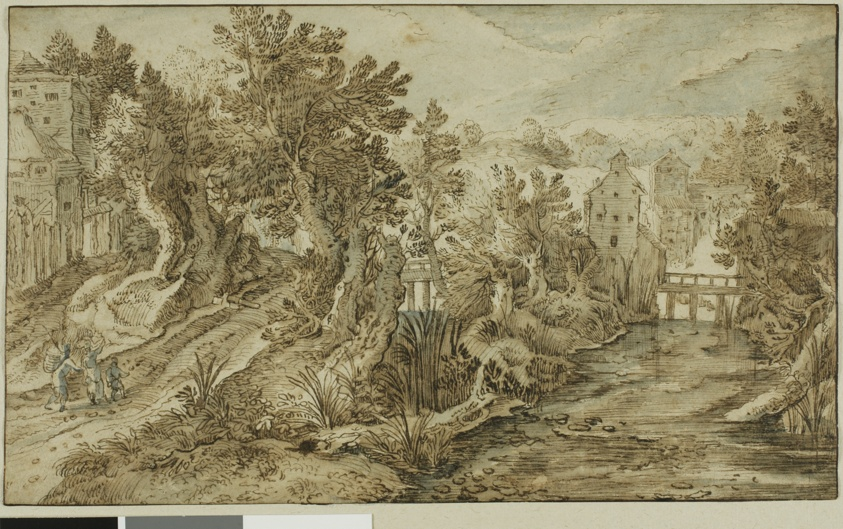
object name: Drawing and Watercolor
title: Village Scene with a River and Wooden Bridge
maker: Peeter Stevens, II (Flemish, 1567-after 1624)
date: 1595/1600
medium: Pen and brown ink and brush and brown and blue washes on cream laid paper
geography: Flanders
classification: pen and ink drawings; drawings (visual works); prints and drawing